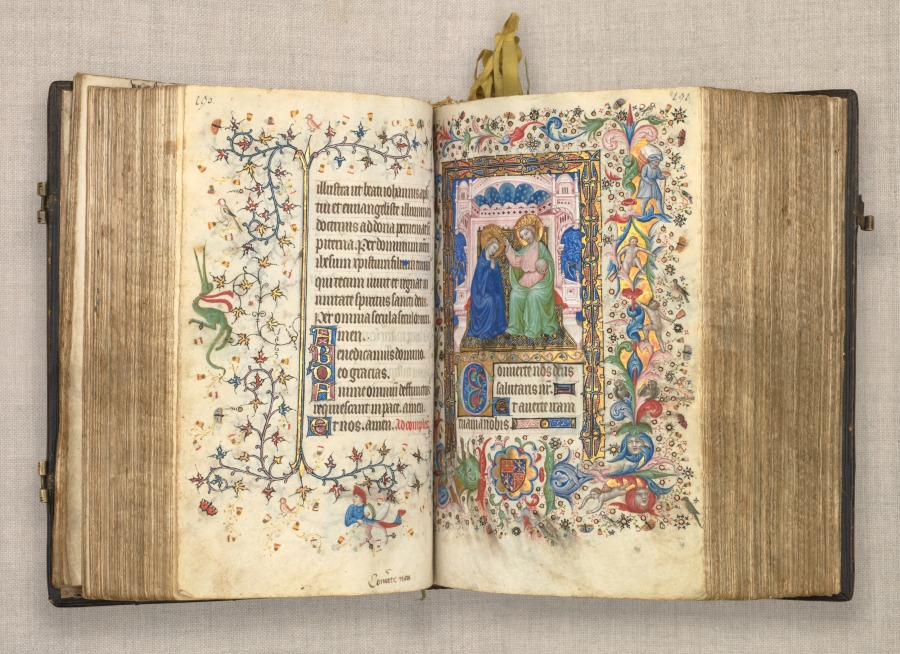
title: Hours of Charles the Noble, King of Navarre (1361-1425): fol. 95v, Text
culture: France, Paris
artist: Master of the Brussels Initials and Associates (French)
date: c. 1405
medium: ink, tempera, and gold on vellum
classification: Bound Volume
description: This precious volume was obviously highly prized by its owner, the French-born King of Navarre, who had his coat of arms painted on no less than twenty folios. Rather than directly commissioning this manuscript from a specific workshop, it seems that Charles the Noble acquired his book of hours -- perhaps ready-made for the luxury market -- while on a trip to Paris in 1404-05. A collaborative effort, six painting styles are evidenced within the pages of this codex, those of two Italians, two Frenchmen, and two Netherlanders. The painter who was responsible for the planning and decoration of the book, and who produced seventeen of the large miniatures, was a Bolognese artist known as the Master of the Brussels Initials. His principal assistant, responsible for most of the borders, was a Florentine who signed his name "Zecho" da Firenze on folio 208 verso.